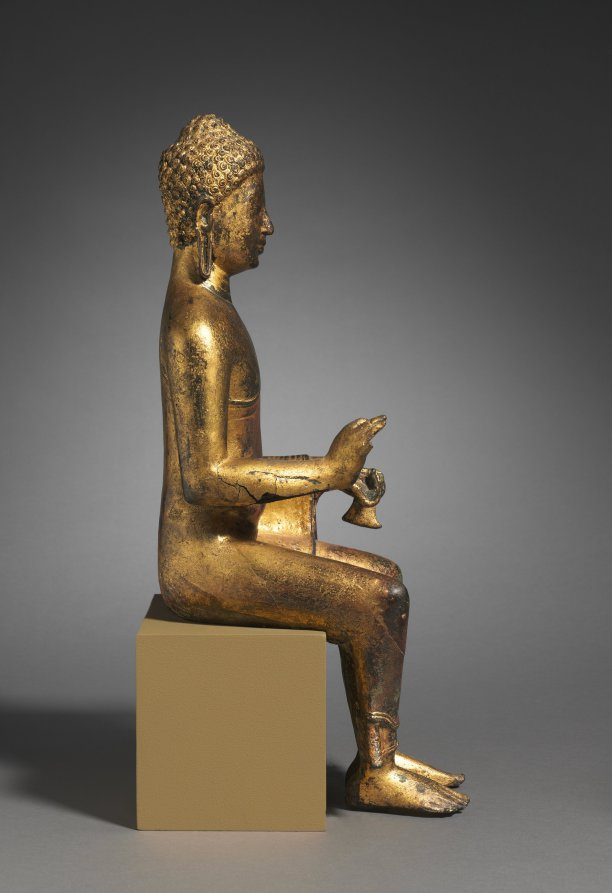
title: Enthroned Buddha Preaching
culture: Myanmar or Thailand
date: 700s–800s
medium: copper alloy with gilding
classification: Sculpture